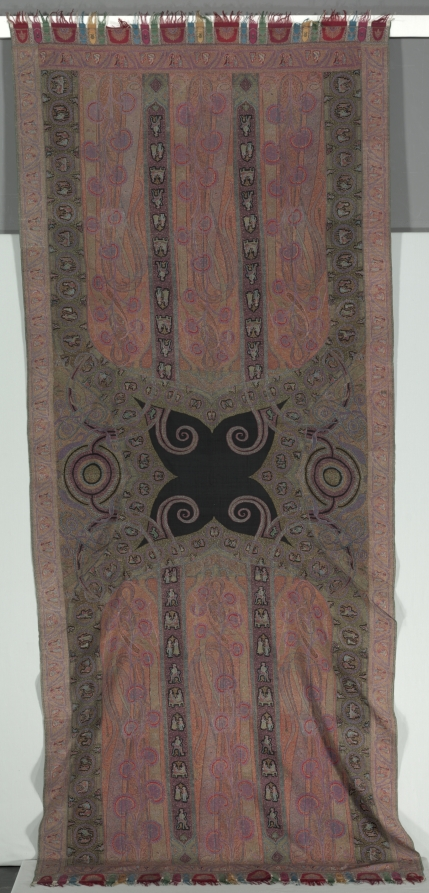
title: Long shawl with woven figures and animals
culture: India, Kashmir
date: c. 1885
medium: 2/2 twill tapestry weave, double interlocked and pieced: wool (possibly pashmina)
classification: Textile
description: Kashmir shawls from India were status symbols in Europe during the 1800s, and few are as rare as this woven example. Over 200 human figures take part in drinking, smoking, dancing, and falconry in the Indian princely scenes that enliven the shawl’s borders and four dark stripes. The stripes alternate with large elongated boteh, or paisley, motifs that intertwine with blossoming stems in a European style adapted by Kashmiri textile artists. This extraordinary woven shawl was probably made to dazzle the jury at one of the European expositions of industrial products, as almost all other figural shawls were embroidered. It was woven in many pieces and then skillfully joined with colorful harlequin end borders.